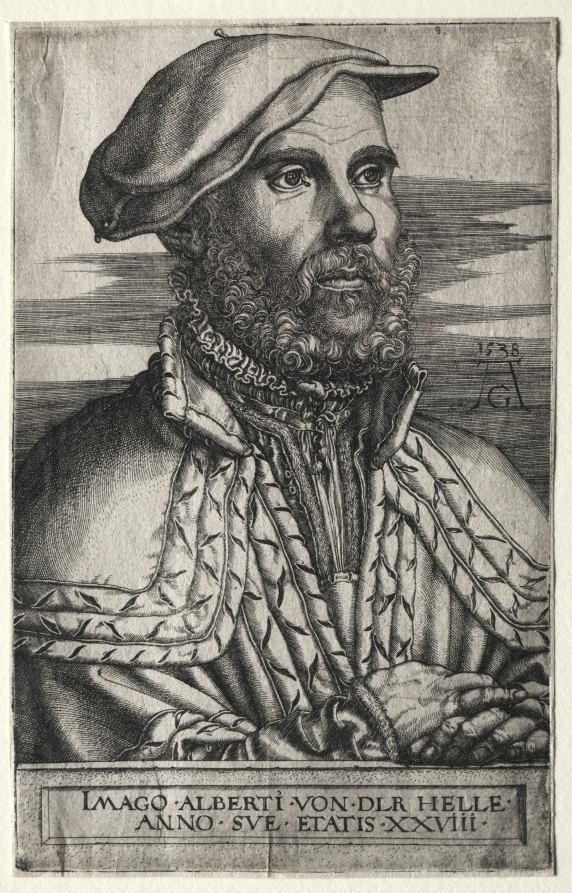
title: Albert van der Helle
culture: Germany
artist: Heinrich Aldegrever (German, 1502–1555/61)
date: 1538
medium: engraving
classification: Print